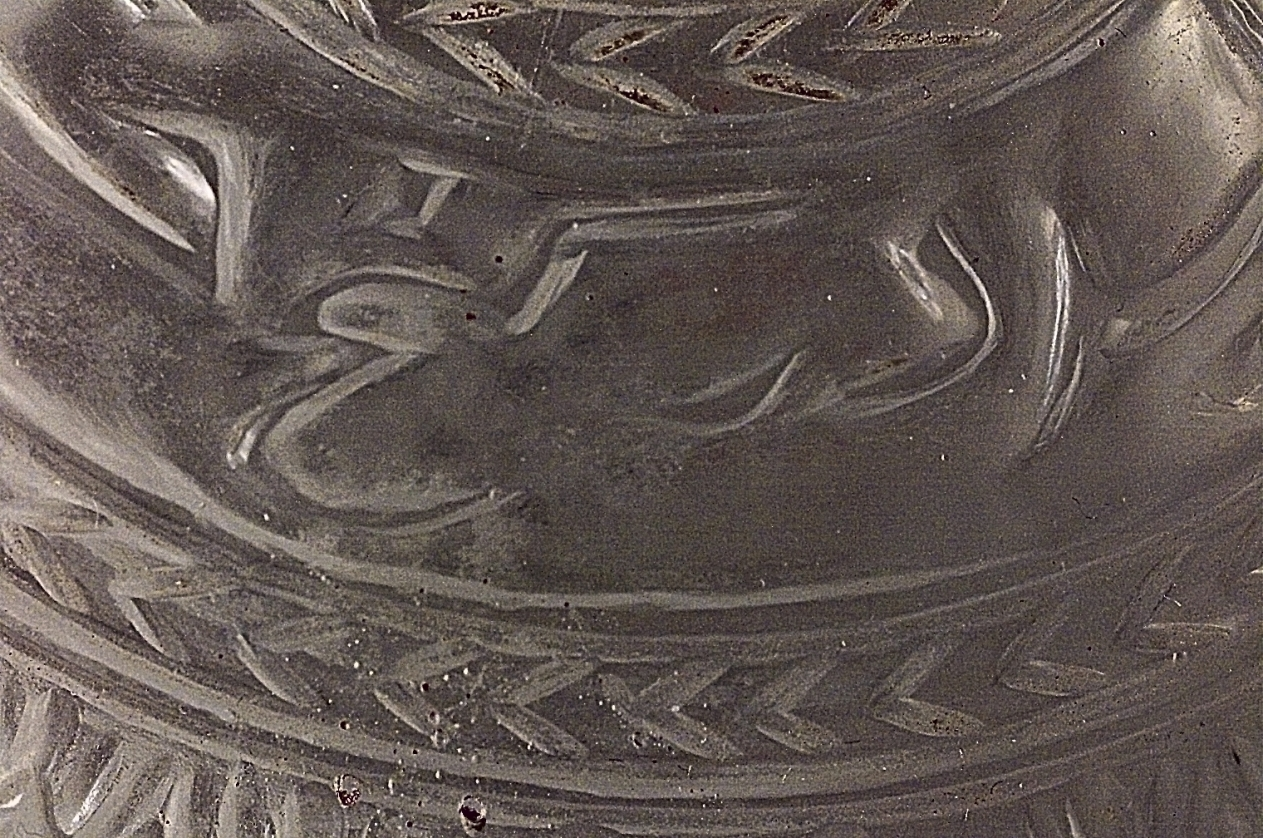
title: Hookah Bowl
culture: India, Mughal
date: 1700s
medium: glass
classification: Glass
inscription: Inscription in Farsi, on body: Even if live charcoal is placed on its head/ The hookah, a teacher of etiquette,/ will not respond unless drawn upon;/ Thus one can learn from its manners of refinement.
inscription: Inscription in Farsi, on shoulder: In the name of Allah the clement and merciful is the key to the wise treasure.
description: The inscription around the body of the base speaks to the use of the hookah in the decadent life of the Mughal court. The hookah is commended for being a proper, refined servant who will not “respond unless drawn upon” or, produce water bubbles when smoke is drawn through the hose. Undoubtedly the witty, poetic allusions would have been appreciated at banquets and other courtly gatherings. The use of wheel-cut glass for this hookah base may have been influenced by English glass and lead crystal that was exported to India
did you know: Around the top of this hookah bowl are incised the opening two lines from the Khamsa (Quintet) of the celebrated Persian poet Nizami (1141–1209).